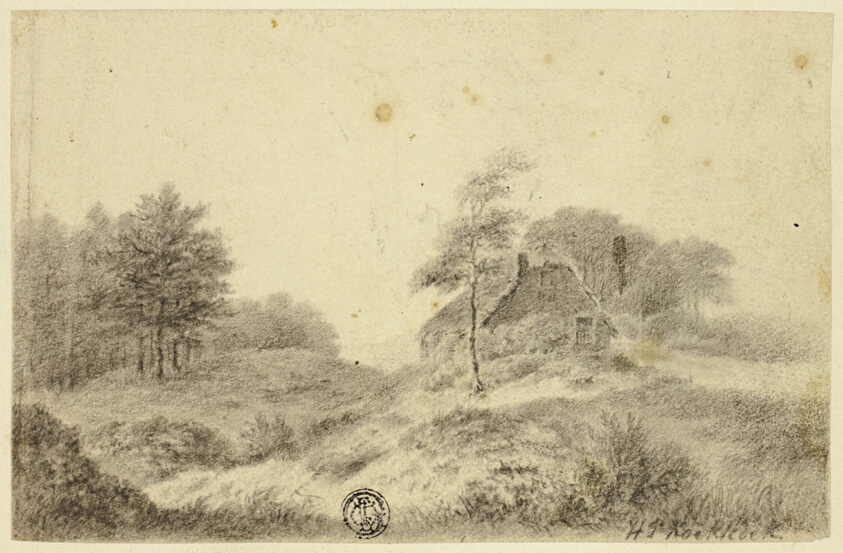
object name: Drawing and Watercolor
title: Cottage on Hill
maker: Hendrik Pieter Koekkoek (Dutch, 1843-c. 1890)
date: c. 1877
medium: Black chalk, on buff wove paper, laid down on cream wove paper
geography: Holland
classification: graphite; drawings (visual works); prints and drawing